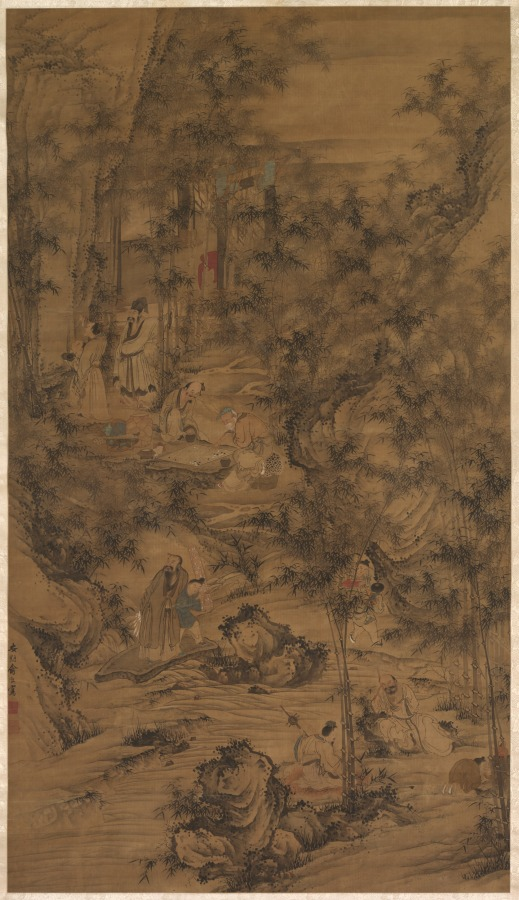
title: The Seven Worthies of the Bamboo Grove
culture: China, Qing dynasty (1644-1911)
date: 1644–1911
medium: hanging scroll, ink and slight color on silk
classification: Painting